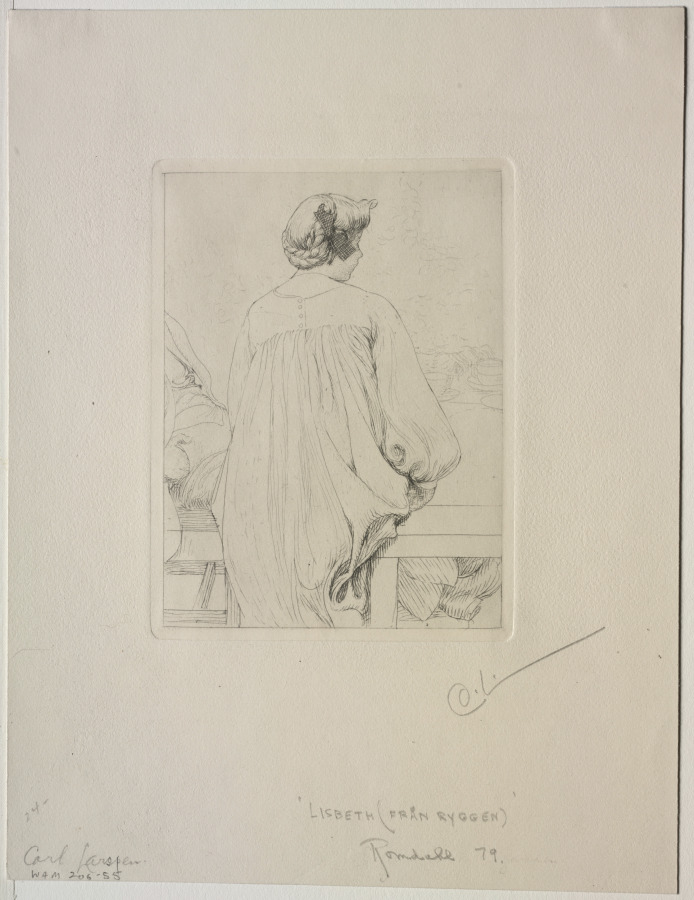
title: Lisbeth, Seen from Behind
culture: Sweden, 20th century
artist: Carl Larsson (Swedish, 1853–1919)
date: 1911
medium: etching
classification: Print